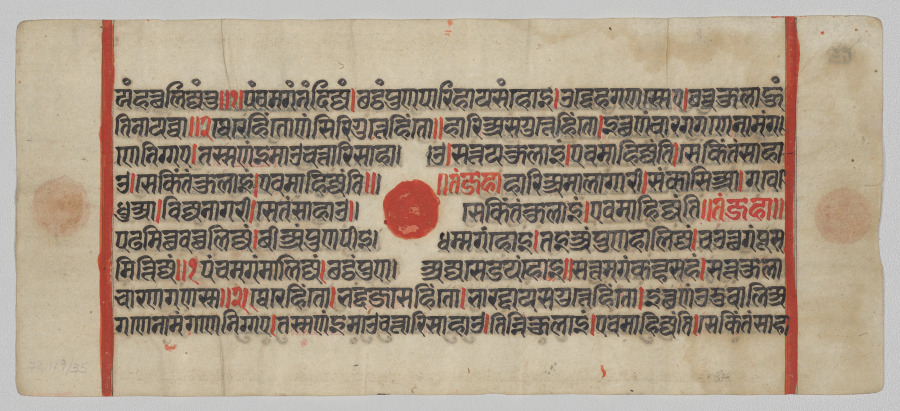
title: Text, Folio 62 (recto), from a Kalpa-sutra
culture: Western India, Gujarat, last quarter of the 15th century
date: c. 1475–1500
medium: Gum tempera, ink, and gold on paper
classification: Painting